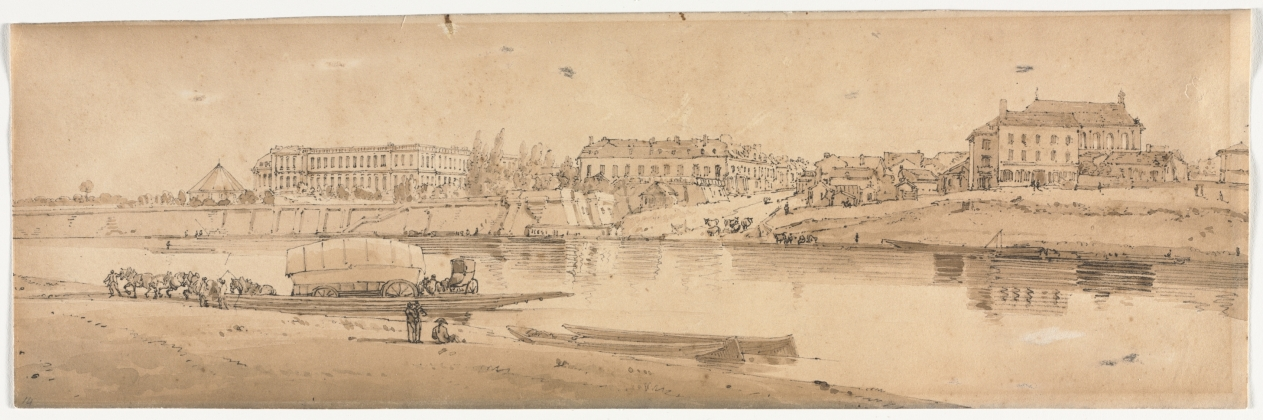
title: A Selection of Twenty of the Most Picturesque Views in Paris: View of the Palace and Village of Choisi on the Banks of the Seine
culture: England, early 19th Century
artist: Thomas Girtin (British, 1775–1802)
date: 1802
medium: soft-ground etching with bistre wash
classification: Print